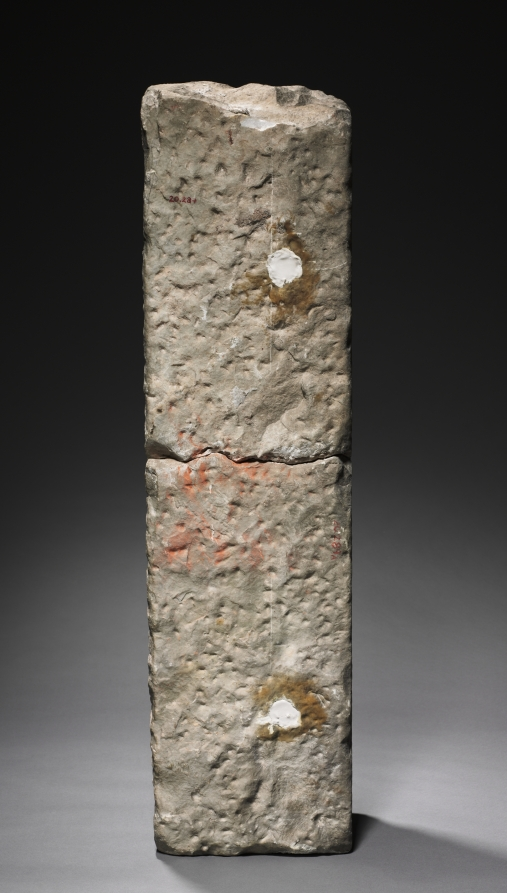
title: Transenna Post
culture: Lombardic, Italy, Rome, Migration period, 8th-9th Century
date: 700s-800s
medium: marble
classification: Sculpture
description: In Christian architecture a transenna is an openwork screen of stone or metal enclosing a shrine. These transenna elements were found in Rome; the posts were said to have been excavated on the Coelian Hill and may have originally formed part of the transenna of the Church of San Saba. The Lombards were an ancient Germanic-speaking tribe that settled in Italy after 568. Their artistic tradition was originally centered on small objects of personal adornment like buckles and brooches. After occupying Italy, the Lombards found themselves in contact with large-scale sculpture of classical and early Christian origin that, by the end of the 700s, they had learned to adopt and imitate, as seen here.